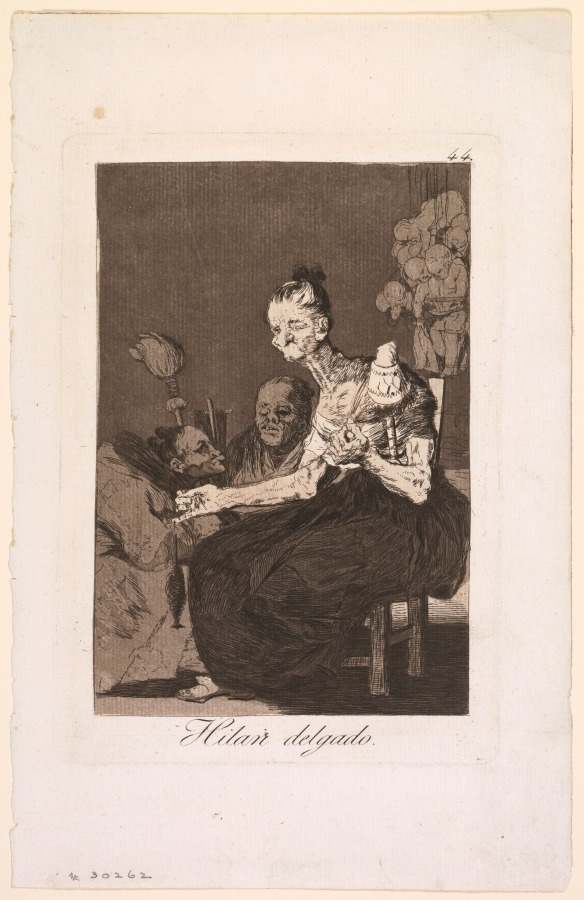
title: They Spin Finely, Plate 44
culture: Spain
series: Los Caprichos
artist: Francisco de Goya (Spanish, 1746–1828)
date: 1799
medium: Etching, aquatint, drypoint, and engraving printed in sepia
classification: Print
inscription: Lower left margin, in graphite: MK 30262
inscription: Engraved in plate: 44, upper right corner, and Hilan Delgado, below image, center.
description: Francisco de Goya creatively engaged with printmaking, producing bold and innovative compositions. This impression is a rare trial proof printed in sepia ink before publication of the series Los Caprichos, whose title translates as “caprices” or “artistic fantasies.” As one of the earliest sheets printed from the plate, it retains Goya’s subtle layers of tonal aquatint absent in later impressions. Note, for example, the slight shift in tone between the pale skin and white blouse of the woman in the foreground whose spinning, a common euphemism for sex work, is likely the subject of the artist’s elaborate critique.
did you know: Francisco de Goya gave each of the prints in Los Caprichos, including this one, intentionally cryptic titles.